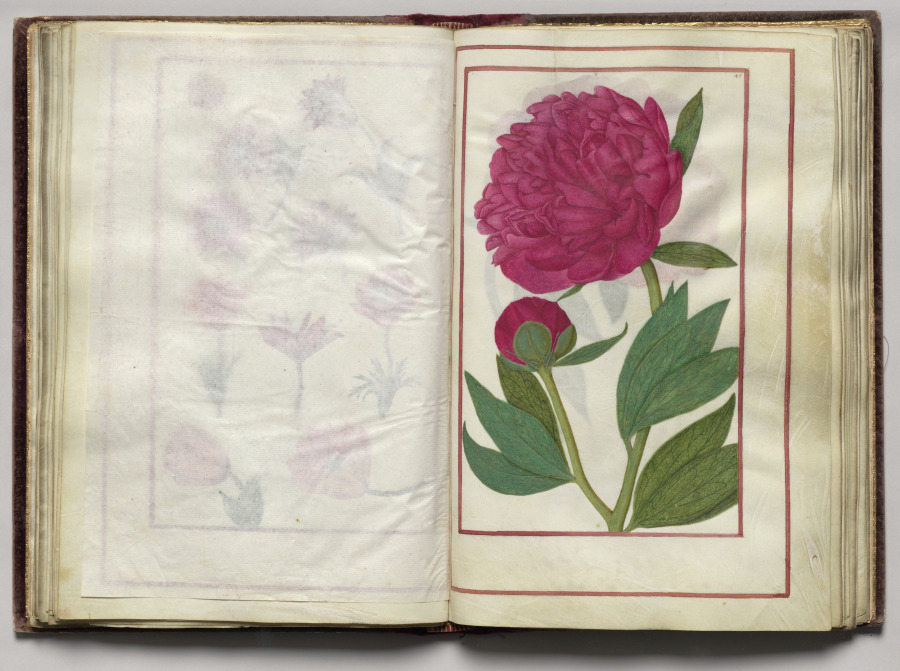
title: Red Peony, folio 24 (recto), from Florilegium (A Book of Flower Studies)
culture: France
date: 1608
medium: watercolor, ink, silver, and gold over occasional traces of pencil, on vellum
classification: Bound Volume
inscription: Dated: Poitiers 1608 (on frontispiece) Signed: On frontispiece in black ink, lower right: Van Kuyk Notation on drawing: Frontispiece: in pencil, lower margin: * élève de Van Kessel, peintre flammand (* in pencil also appears in front of Van Kuyk's name).